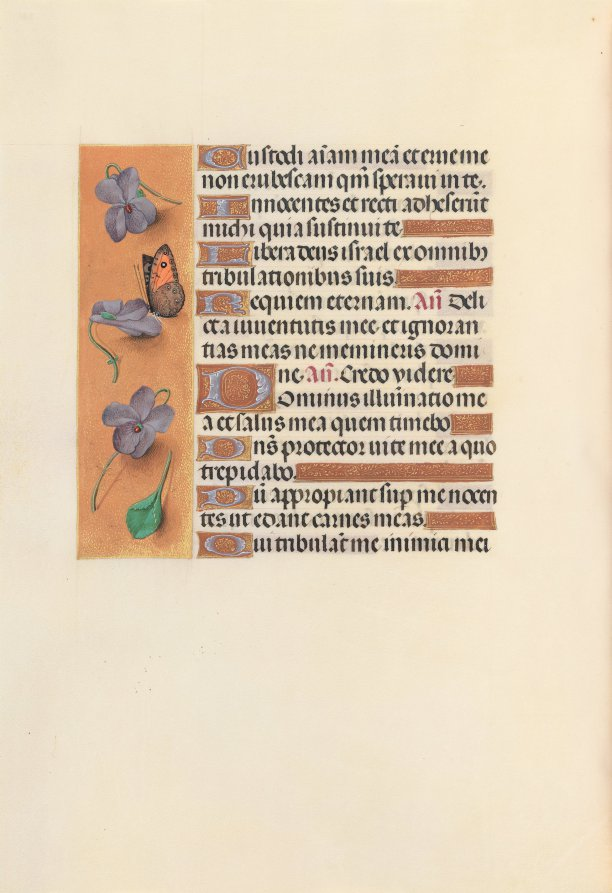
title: Hours of Queen Isabella the Catholic, Queen of Spain: Fol. 235v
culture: Flanders, Ghent and Bruges, late 15th century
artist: Master of the First Prayerbook of Maximillian (Flemish, c. 1444–1519)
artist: and Associates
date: c. 1500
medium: ink, tempera, and gold on vellum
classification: Bound Volume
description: This manuscript was illuminated by a circle of at least five highly organized manuscript painters active in the Flemish cities of Ghent and Bruges. The principal illuminator was Alexander Bening, who painted the majority of the book's miniatures. Manuscripts produced by this circle of artists are renowned for the decoration of their borders, which typically feature a rich variety of realistically-painted flowers, birds, and butterflies. This prayer book, called a book of hours, was intended not for a cleric, but for the private devotions of a lay person-in this case, Isabella the Catholic, Queen of Spain (1451-1504). Isabella's coat of arms embellishes the book's frontispiece. It is unlikely that the book was commissioned by the Queen herself; rather, she probably received it as a diplomatic gift from someone courting her patronage, perhaps Cardinal Francisco Jimenez de Cisneros. A Franciscan friar, Jimenez was dependent upon Isabella for his advancement, first to the post of Queen's confessor in 1492, and then to Archbishop of Toledo in 1495.